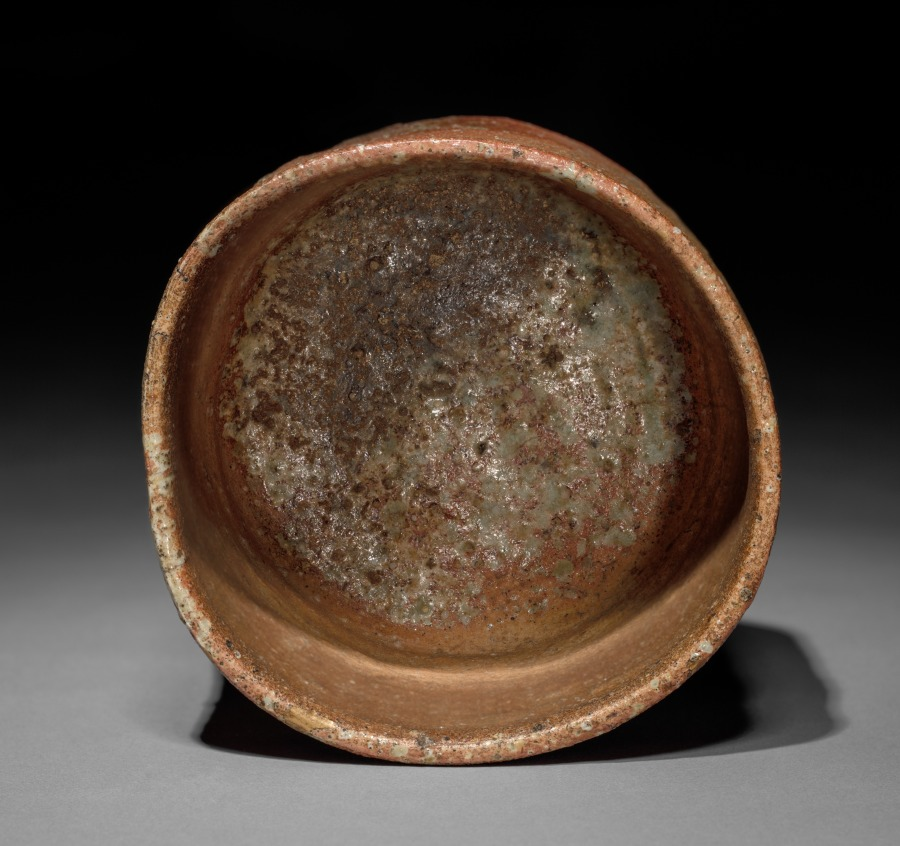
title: Tea Bowl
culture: Japan, Edo period (1615–1868)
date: 1600s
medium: stoneware with natural ash glaze (Shigaraki ware)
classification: Ceramic